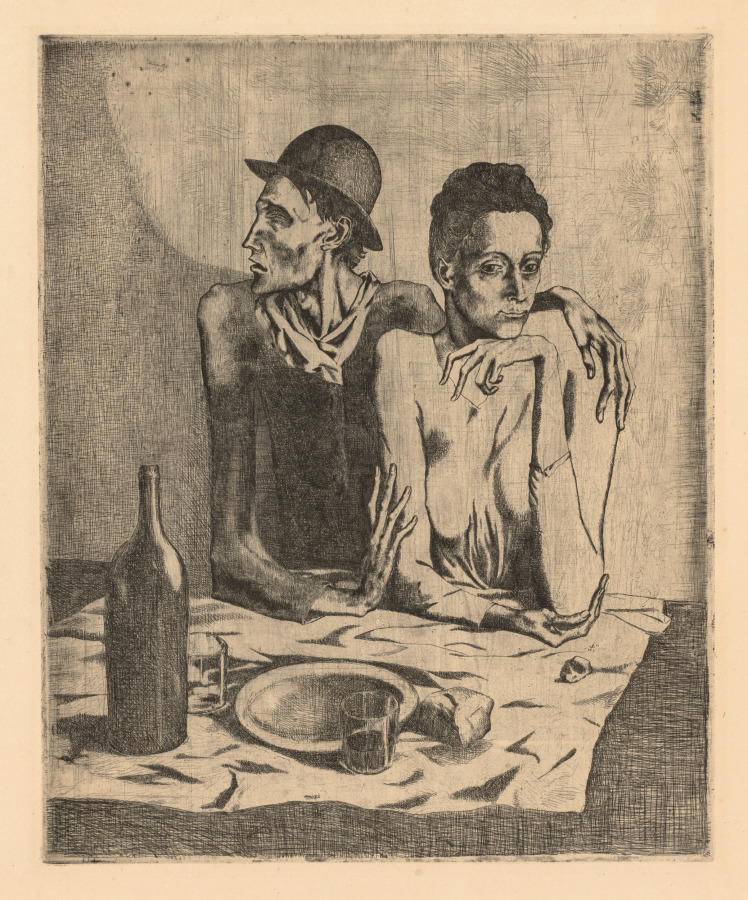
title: The Frugal Meal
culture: Spain, 20th century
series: The Saltimbanques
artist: Pablo Picasso (Spanish, 1881–1973)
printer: Louis Fort (French, active 1800s–1900s)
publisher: Ambroise Vollard (French, 1867–1939)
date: September 1904, printed 1913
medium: etching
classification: Print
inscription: watermark: VAN GELDER ZONEN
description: In this early print, Pablo Picasso depicted a couple—possibly two performers—sitting before a meager meal. Although the woman gazes forward directly, her male companion's unfocused stare suggests his blindness. This subject was one that Picasso explored during his Blue Period (1901–4), a stage of his career when he used a predominantly cool palette to depict figures marginalized by society.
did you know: To create this print, Pablo Picasso recycled a zinc plate previously used by a friend.